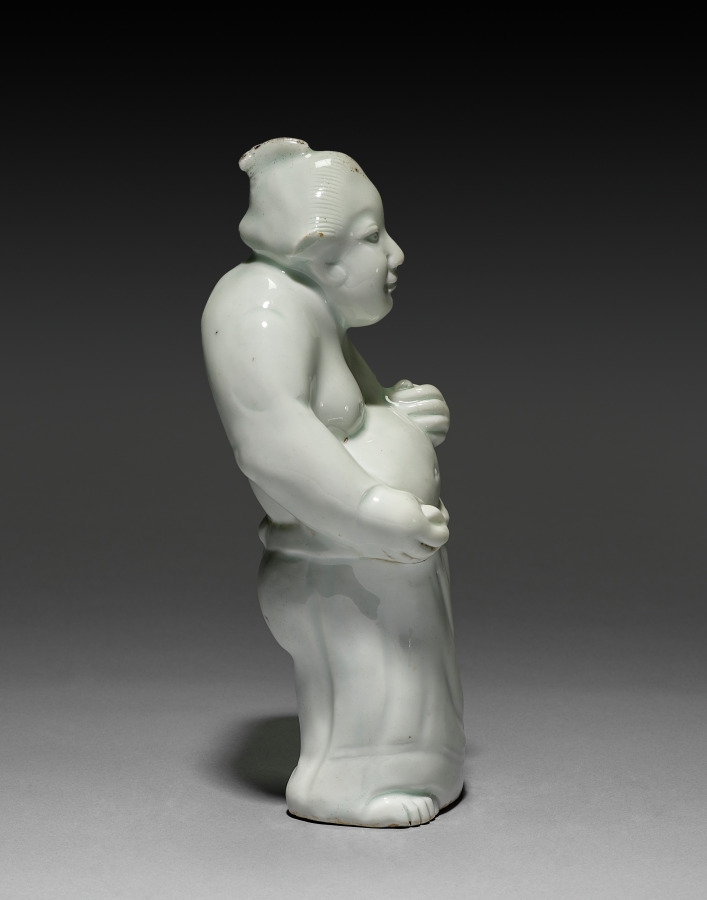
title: Standing Figure of a Sumo Wrestler, Arita Ware (?)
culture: Japan, Edo period (1615–1868)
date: 1700s-1800s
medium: porcelain, molded and carved, with celadon overglaze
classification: Sculpture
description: Catalogue of the Severance and Greta Millikin Collection (CMA, 1990): 85, no. 137.